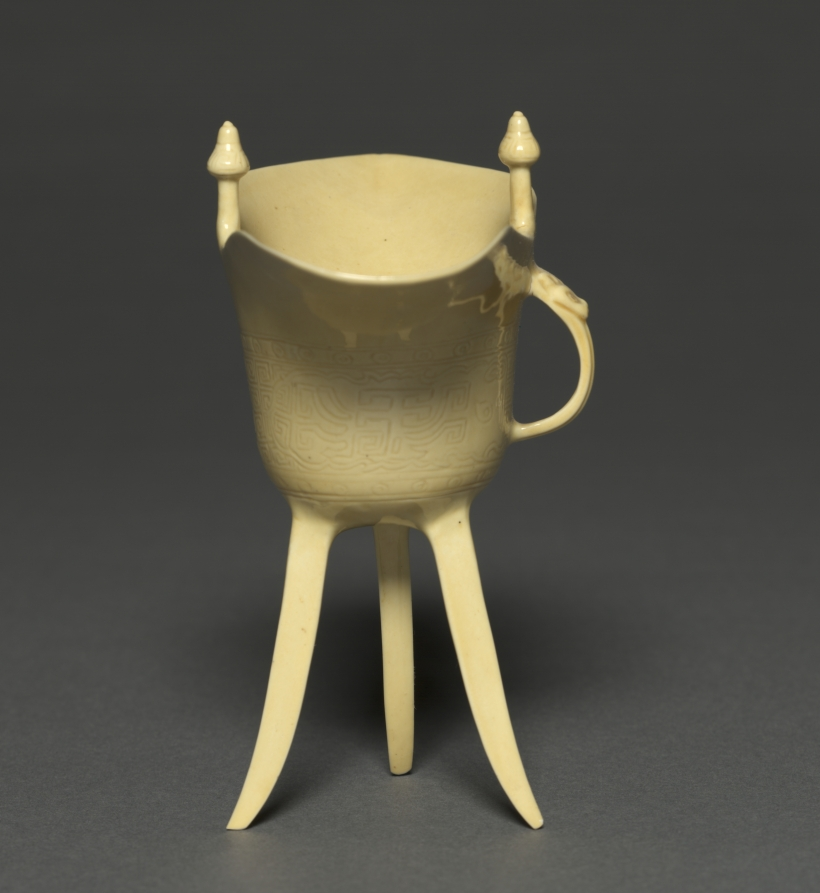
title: Libation Cup in the Form of a Jue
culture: China, Jiangxi province, Jingdezhen, Qing dynasty (1644-1911), Kangxi period (1662-1722)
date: 1662–1722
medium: porcelain with incised and applied decoration and yellow glaze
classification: Ceramic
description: A jue is an ancient Chinese vessel originally designed for serving wine during ceremonies. Bronze jue became prominent during the Shang (c. 1500–1050 BCE) and Zhou (1050–221 BCE) dynasties. This particular piece, made of porcelain during the Qing dynasty (1644–1911), emulates the earlier bronze designs. It reflects the owner's taste for antiquity.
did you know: The handle is decorated with a dragon mask, while the body has a fret pattern in the incised underglaze.